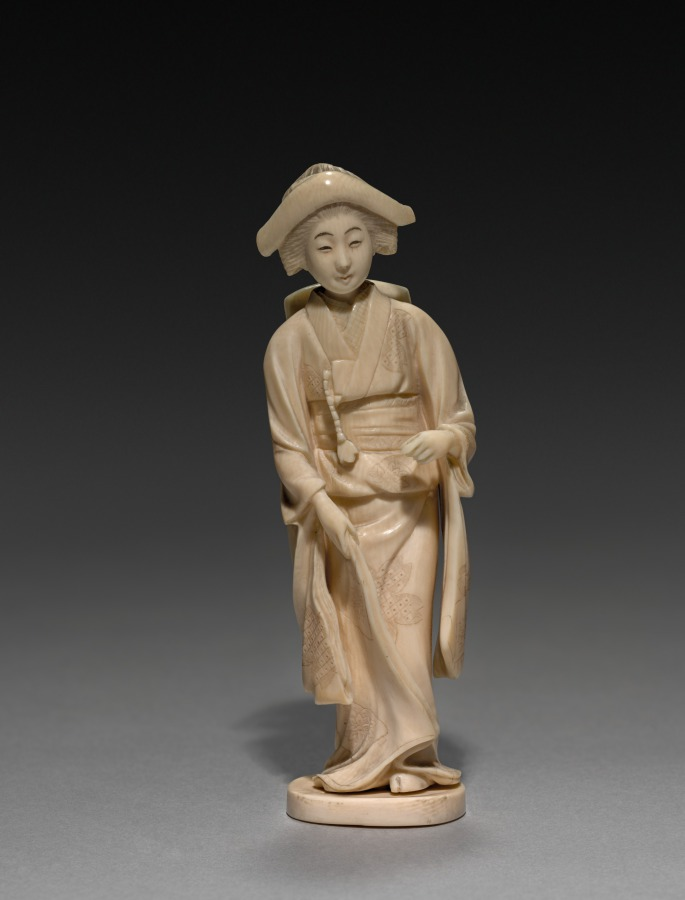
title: Woman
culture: Japan, Meiji period (1868–1912)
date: early 1900s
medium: ivory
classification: Ivory